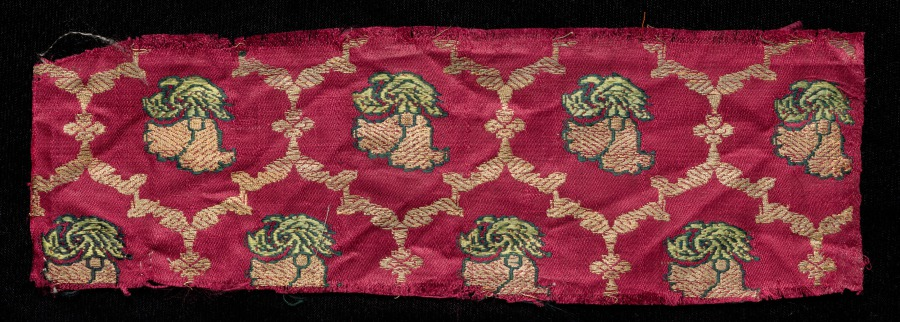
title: Fragment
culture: India, Gulbarga ?, 19th century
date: 1800s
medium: brocade; silk and metal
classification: Textile